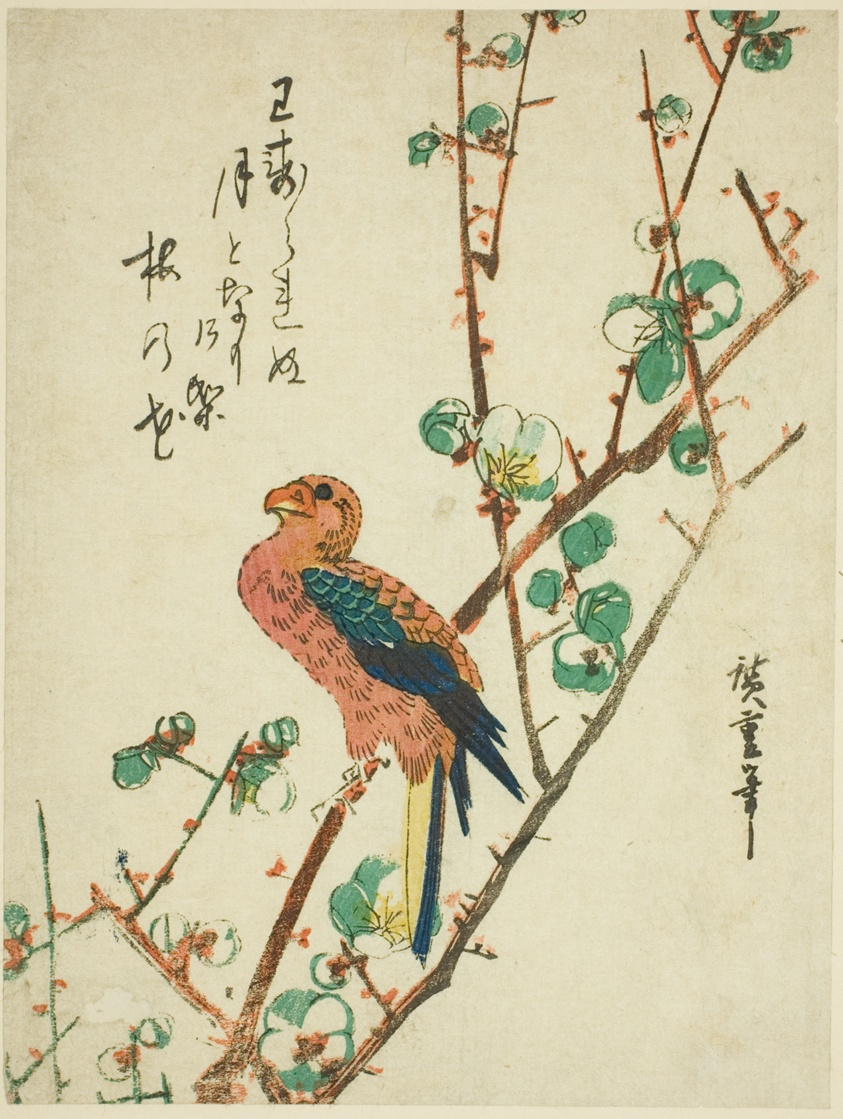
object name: Print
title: Parrot on plum tree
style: Japanese (culture or style)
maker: Utagawa Hiroshige 歌川 広重; Japanese, 1797-1858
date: 1830s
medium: Color woodblock print; chuban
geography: Japan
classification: woodblock print; print; asian art